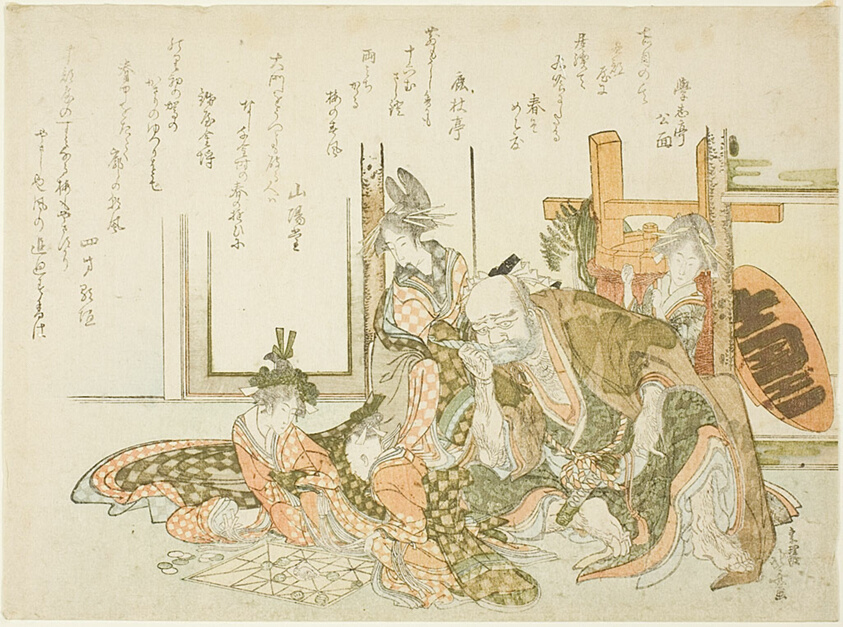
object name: Print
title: An Old Man and Attendants Watching the Sugoroku Game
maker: Katsushika Hokusai 葛飾 北斎; Japanese, 1760-1849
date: 1799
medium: Color woodblock print; surimono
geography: Japan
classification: woodblock print; print; asian art